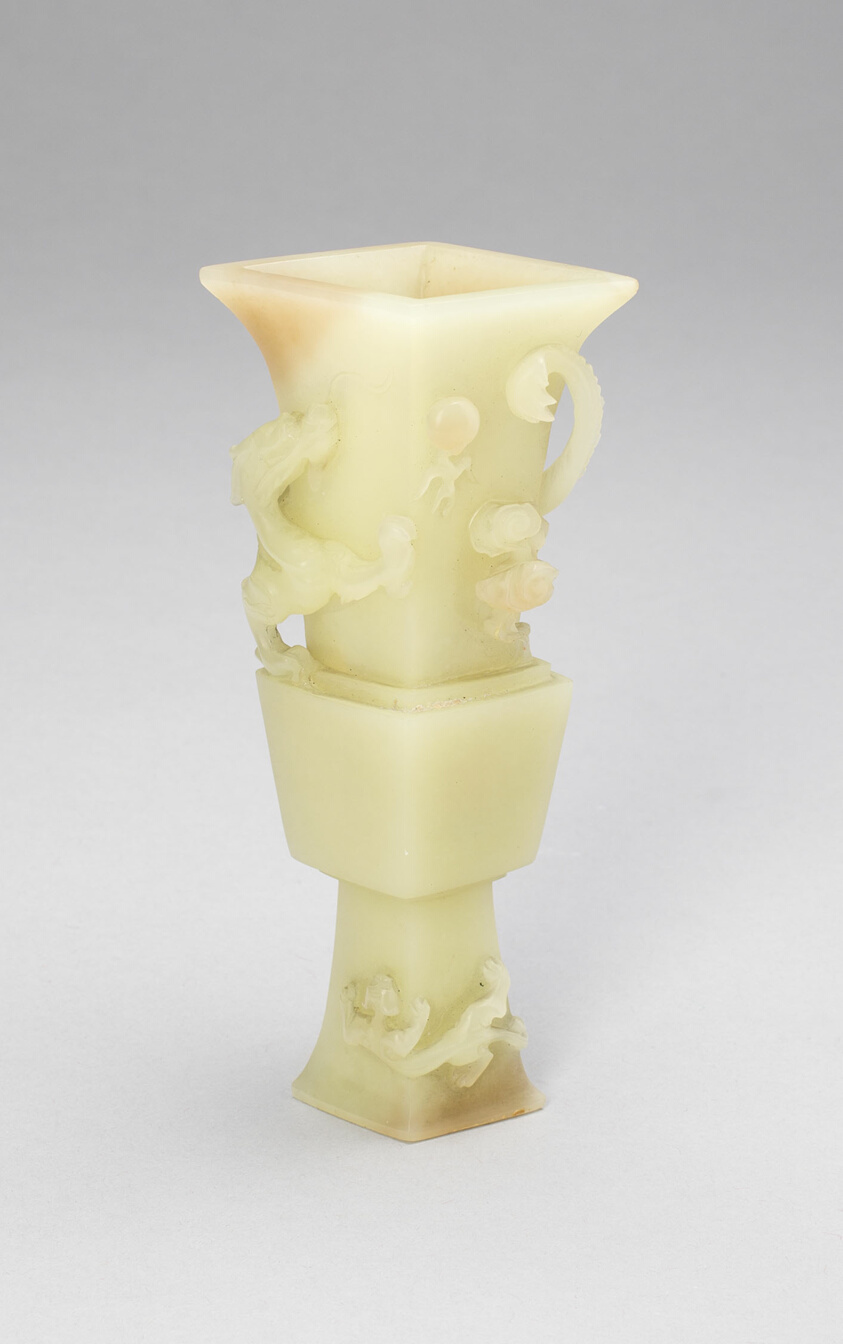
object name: Vessel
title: Vase with Dragons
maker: China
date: Ming dynasty (1368–1644)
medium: Jade (nephrite)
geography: China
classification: jade; asian art